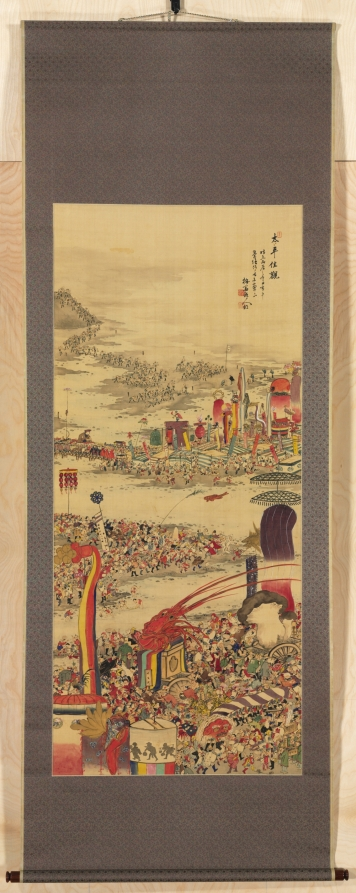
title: The Sand-Carrying Festival (Sunamochi Matsuri)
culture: Japan, Edo period (1615–1868)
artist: Sakai Basai (Japanese, dates unknown)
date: 1856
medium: hanging scroll; ink and color on silk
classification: Painting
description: Dredging waterways to preserve their function once required the cooperation of large numbers of people, seen at the top of this painting. Sand-carrying festivals were historically associated with religious rites or gathering alms to construct places of worship, and involved not only the labor of collecting sand from rivers but also parades and performances marking the event. Kyoto’s Kamo River has been dredged many times over the centuries, including in 1856, the year this image was made. Although the title at the upper right says Taihei Kakan, or “Peaceful, Beautiful View,” the painter’s delightful scene reminds his audience that at the best of times, peace may have little to do with quiet. Sakai Baisai was a student of literati painter Yamamoto Baiitsu (1783–1856). He was active until around 1879, when he relocated to Kobe to make his living as a design painter on porcelains destined for export.